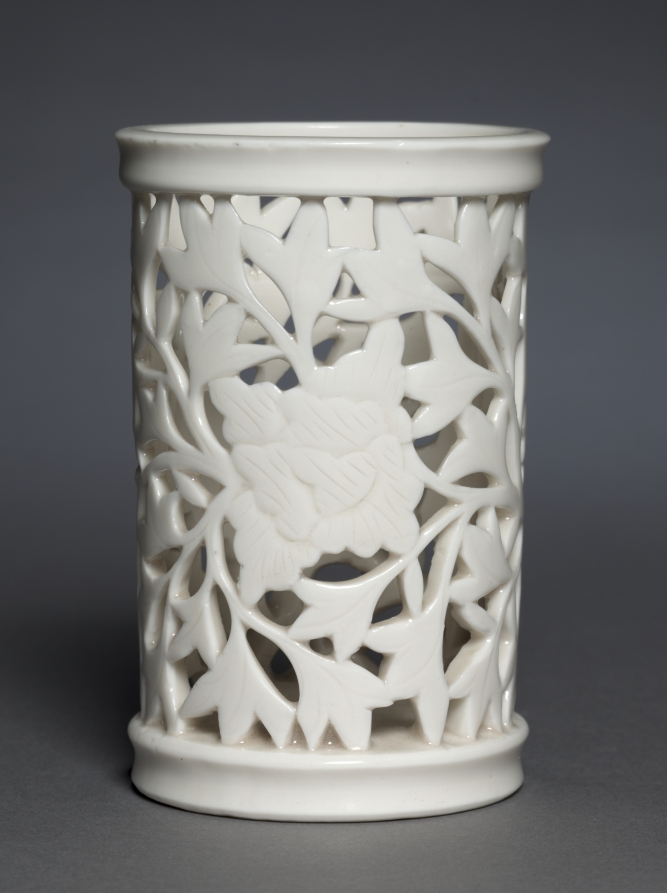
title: Brush Pot with Peonies: Dehua Ware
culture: China, Fujian province, Qing dynasty (1644-1911)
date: 1644–1911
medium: glazed porcelain with pierced and incised decoration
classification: Ceramic